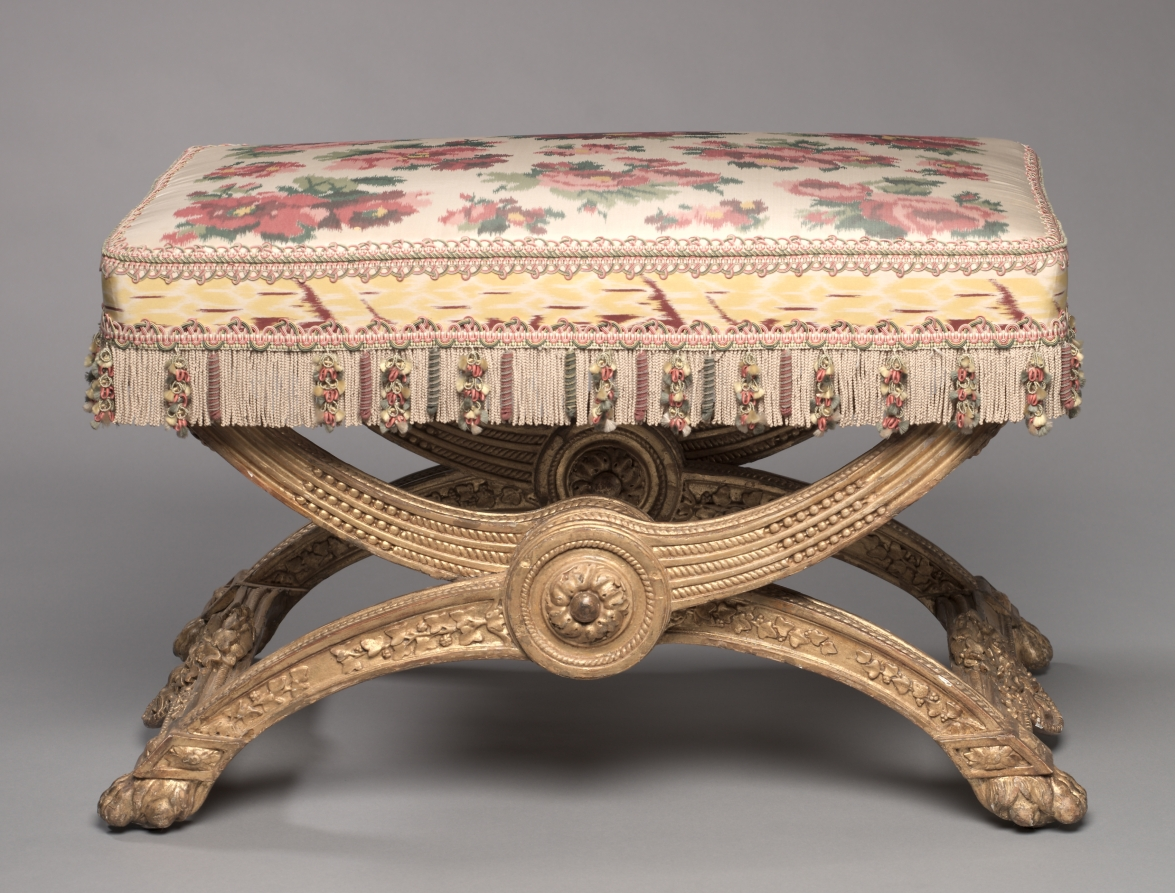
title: Stool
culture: France, 18th century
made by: Jean-Baptiste-Claude Sené (French, 1748–1803)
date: 1786–1787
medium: carved and gilded wood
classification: Furniture and woodwork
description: This stool was made in 1786-1787 for the Queen's gaming room at the palace of Compiègne.